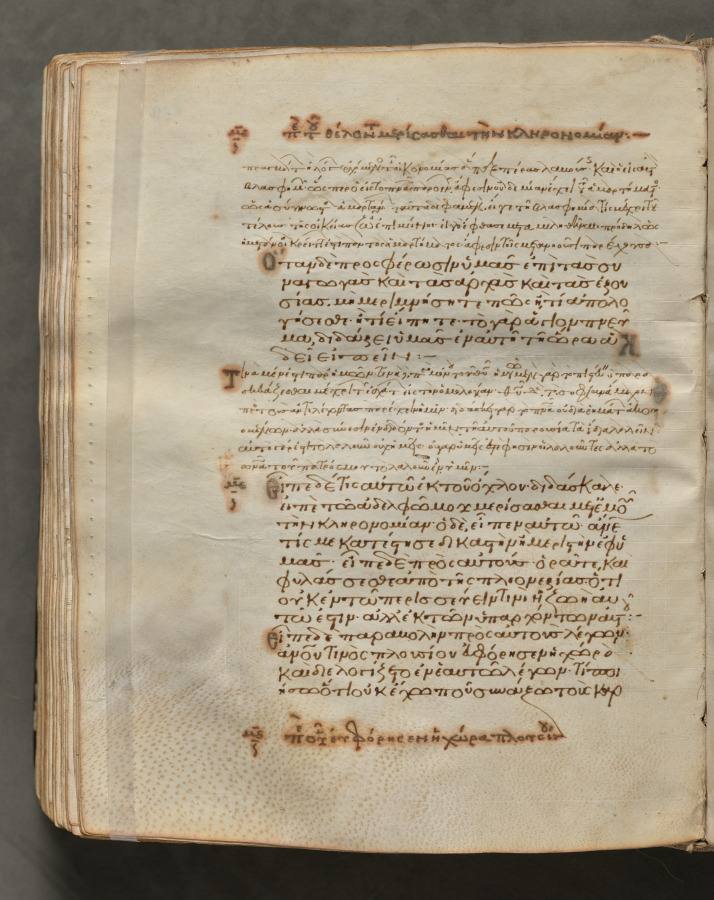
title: Text, folio 266 (verso), from a Gospel Book with Commentaries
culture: Byzantium, Constantinople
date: c. 1000–1100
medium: ink, tempera, and gold on vellum; leather binding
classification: Bound Volume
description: Each of the four gospels in this book opens on a page with brilliantly illuminated borders depicting the author of the text as well as birds—principally peacocks, symbols of the immortality of the soul—and fountains, representing the fountain of life and the salvation of the soul. This volume consists of 428 leaves with texts in Greek. Its level of sophistication suggests that it was probably written and decorated in a monastery in Constantinople.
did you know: Gospel books were carried in procession through Byzantine churches.